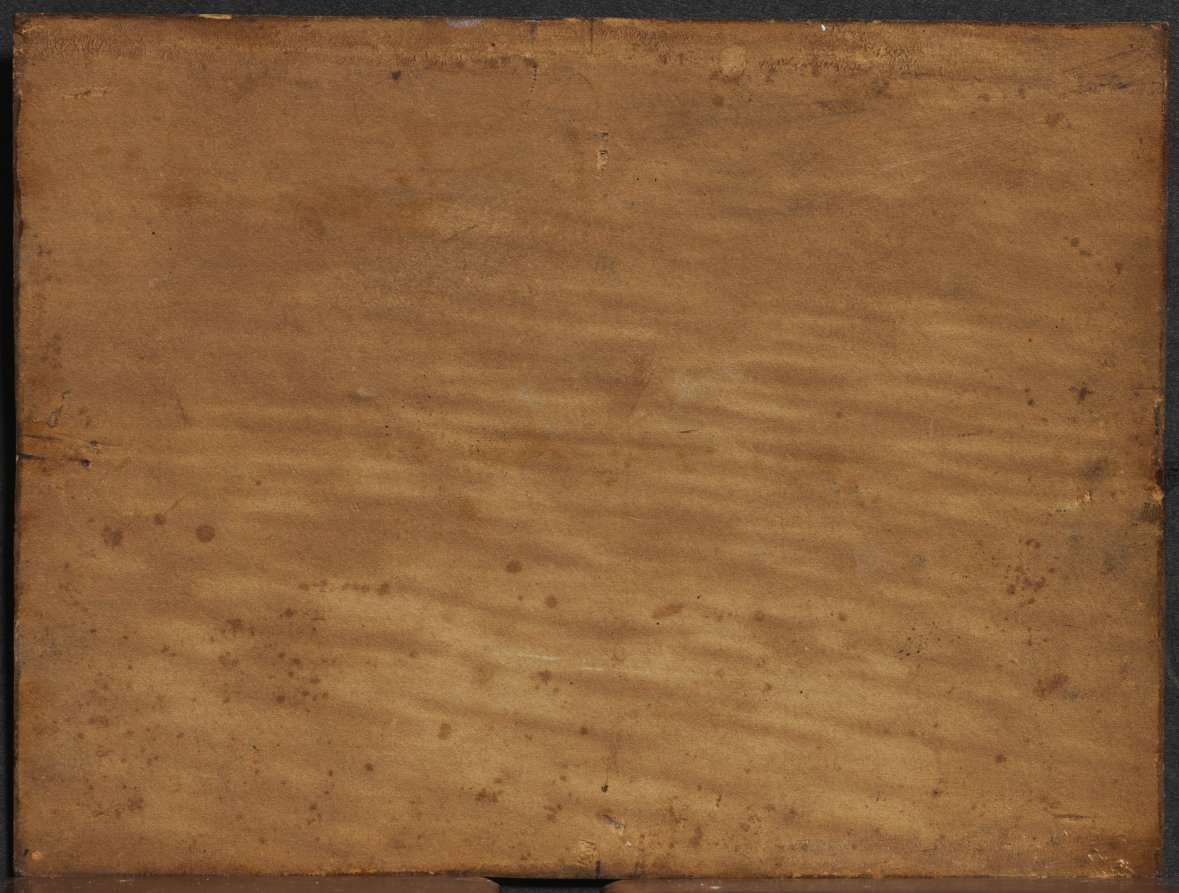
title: Battle of Poitiers, 25 October 732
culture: France, 19th century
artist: circle of Baron Charles de Steuben (French)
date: 1830s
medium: oil on pulp board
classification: Painting